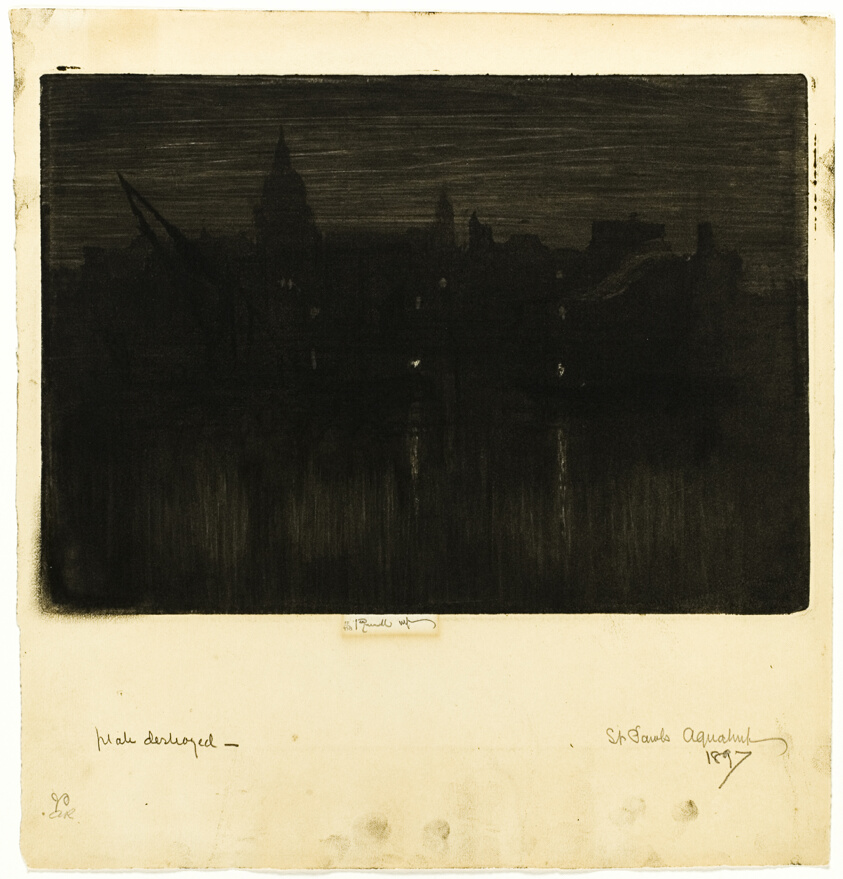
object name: Print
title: St. Paul's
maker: Joseph Pennell (American, 1857-1926)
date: 1894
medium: Aquatint with sandpaper ground on cream wove paper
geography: United States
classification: aquatint; print; prints and drawing